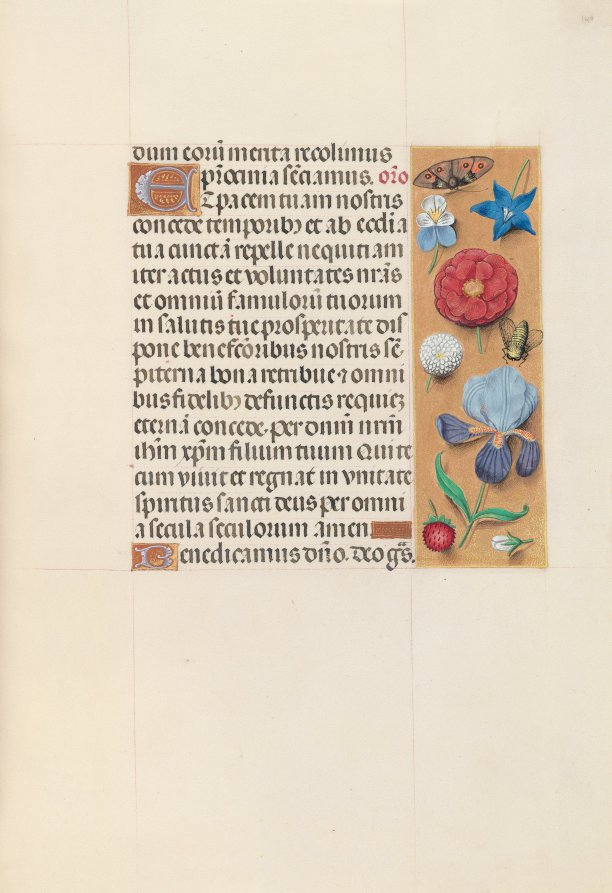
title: Hours of Queen Isabella the Catholic, Queen of Spain: Fol. 140r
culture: Flanders, Ghent and Bruges, late 15th century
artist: Master of the First Prayerbook of Maximillian (Flemish, c. 1444–1519)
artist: and Associates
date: c. 1500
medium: ink, tempera, and gold on vellum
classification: Bound Volume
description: This manuscript was illuminated by a circle of at least five highly organized manuscript painters active in the Flemish cities of Ghent and Bruges. The principal illuminator was Alexander Bening, who painted the majority of the book's miniatures. Manuscripts produced by this circle of artists are renowned for the decoration of their borders, which typically feature a rich variety of realistically-painted flowers, birds, and butterflies. This prayer book, called a book of hours, was intended not for a cleric, but for the private devotions of a lay person-in this case, Isabella the Catholic, Queen of Spain (1451-1504). Isabella's coat of arms embellishes the book's frontispiece. It is unlikely that the book was commissioned by the Queen herself; rather, she probably received it as a diplomatic gift from someone courting her patronage, perhaps Cardinal Francisco Jimenez de Cisneros. A Franciscan friar, Jimenez was dependent upon Isabella for his advancement, first to the post of Queen's confessor in 1492, and then to Archbishop of Toledo in 1495.